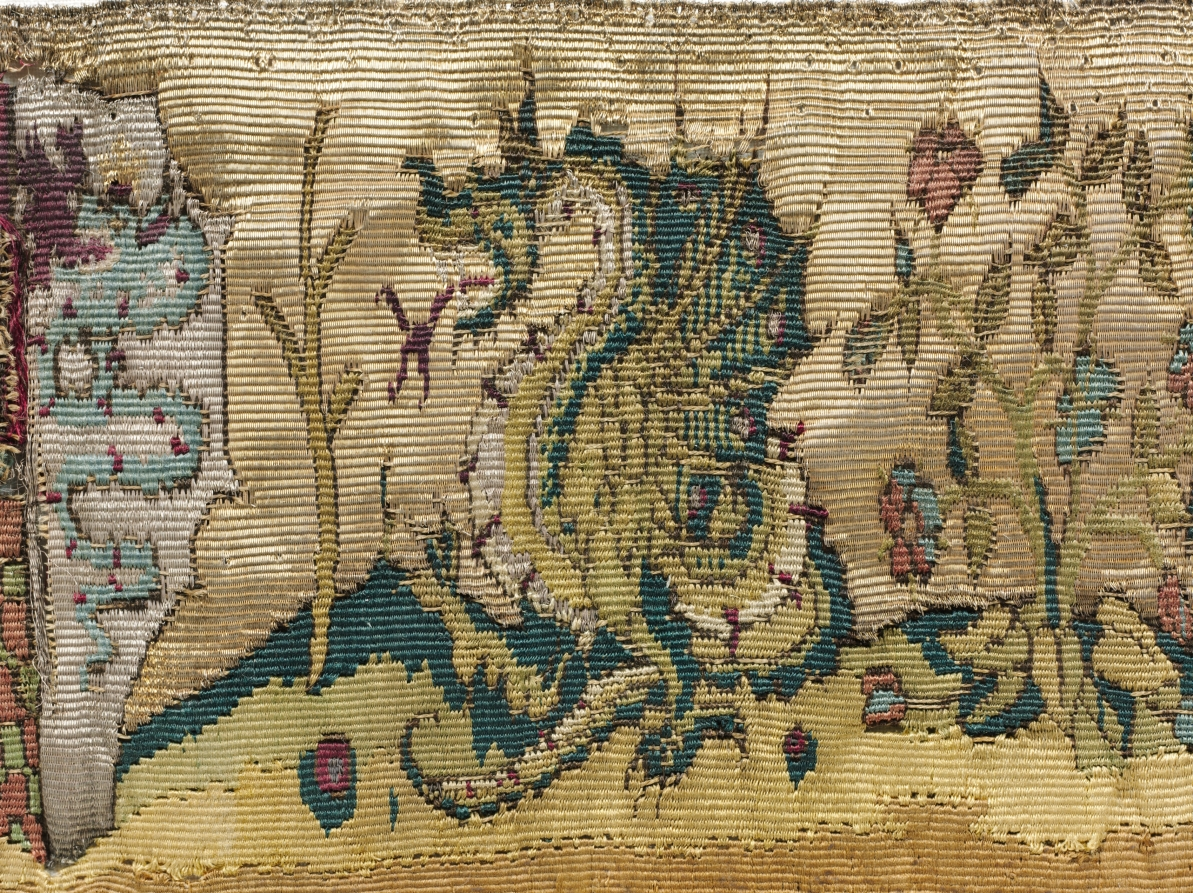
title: Tapestry Border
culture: Italy, Lombardy, Milan ?, first half of 15th century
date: 1400–1450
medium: tapestry weave; silk, silver and gold wire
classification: Tapestry